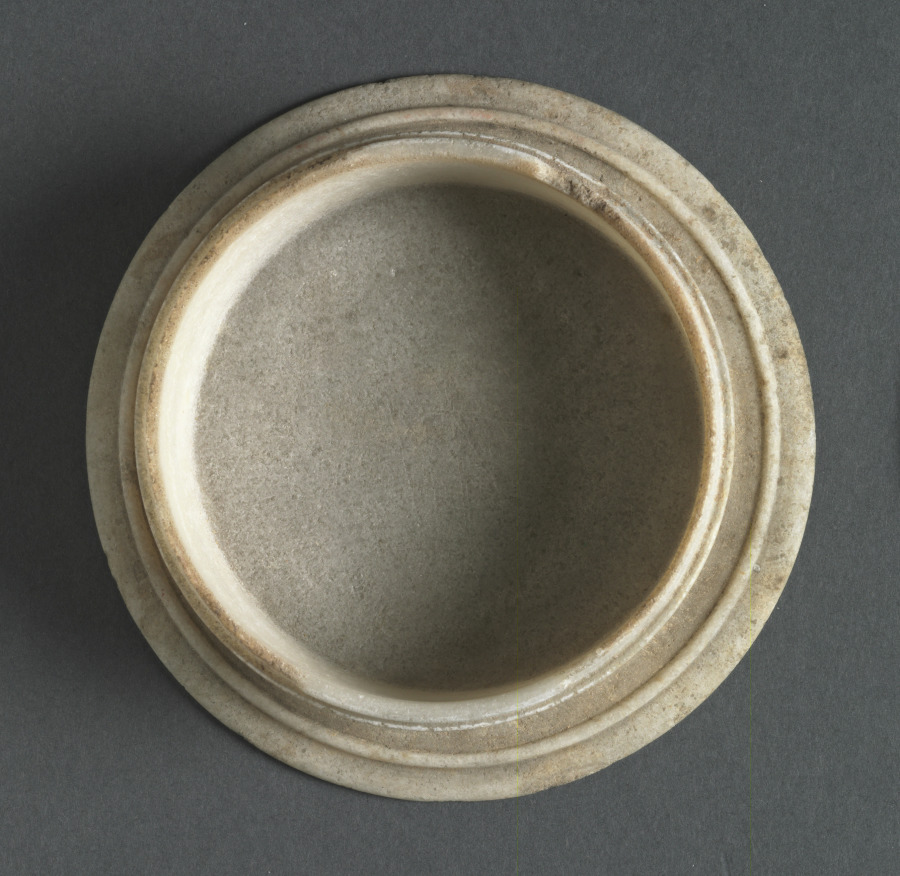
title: Pyxis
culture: Greece, Attic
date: 400–300 BCE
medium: marble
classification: Stone